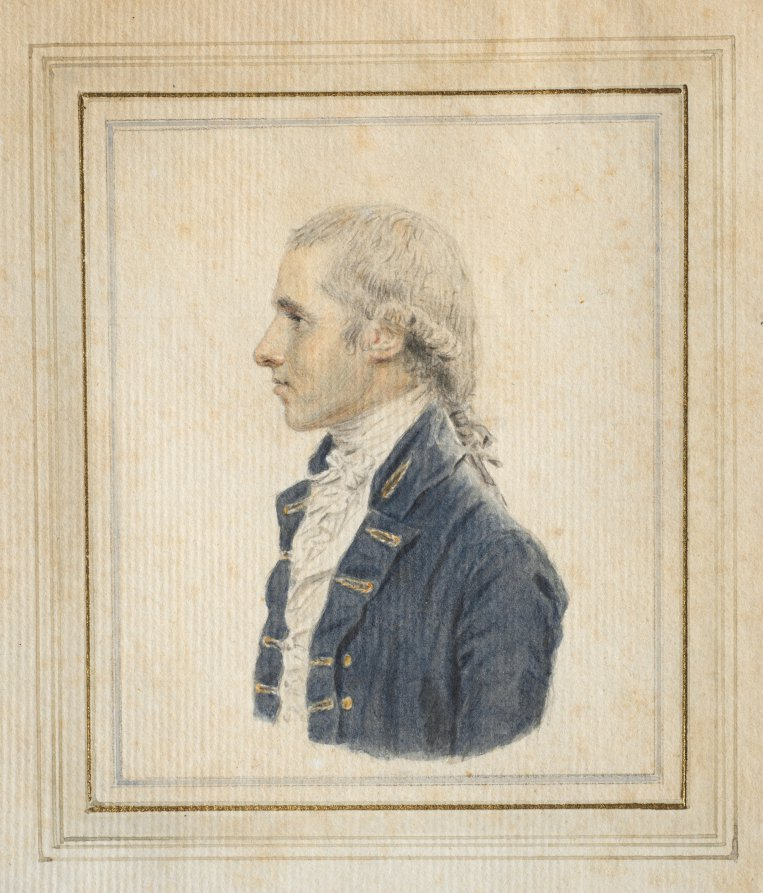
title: Portrait of Sir Captain West of the Dutton Indiaman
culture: England, 18th century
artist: John I Smart (British, 1741–1811)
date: 1785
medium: watercolor over traces of black chalk, with metallic gold paint on laid paper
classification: Portrait Miniature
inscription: by artist, across bottom, in brown ink: Captain West of the Dutton Indiaman 1785 / drawn on board going to Madras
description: Smart painted Captain West’s head in profile, turned to the right. His powdered hair is worn en queue with curls above his ears and white powder on his shoulders. He has long eyelashes, parted lips, and a grayish cast to his skin tone, particularly over his beard. West dons a blue coat with gold buttonholes embroidered in gold and a white waistcoat, high collar, and cravat tied in a small bow. This work is a finished drawing by Smart, evidenced in part by its larger size and by the fact that the painting of the sitter’s clothing is complete and the bust is placed within an elaborate border comprised of blue, metallic gold, and gray lines. This finished quality does not preclude the possibility that the drawing may also have functioned as a preparatory sketch for a miniature on ivory, which has not been located. Captain James West sailed the Dutton Indiaman from England to Madras, India, on several occasions, including Smart’s voyage in 1785. At least one of the sons of British judge Sir Elijah Impey was traveling with Smart on his journey to India and had his portrait taken by the artist. Another of Impey’s sons wrote of an earlier return passage to England made with Captain West in 1784, shedding light on the sea captain’s character and disposition. Impey’s account conveys not only West’s personality but the atmosphere that prevailed on the ship over which the captain presided and on which Smart traveled and worked. As indicated by an inscription in the artist’s hand, this portrait was painted by Smart while he was aboard the Dutton en route to Madras and probably retained by the artist as a memento. In addition to the portrait of “Master Impey,” Smart is known to have taken the likeness of other figures while aboard the Dutton, including the quartermaster “Baker” and a French ship called the Consalateur, which was intercepted by the Dutton while sailing to India. The current location of both works is unknown.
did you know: In 1784 it was written that "Captain James West, had the just reputation of being a first-rate mariner, a well-informed, and thoroughly practical man of business, and in every way worthy of confidential intimacy."